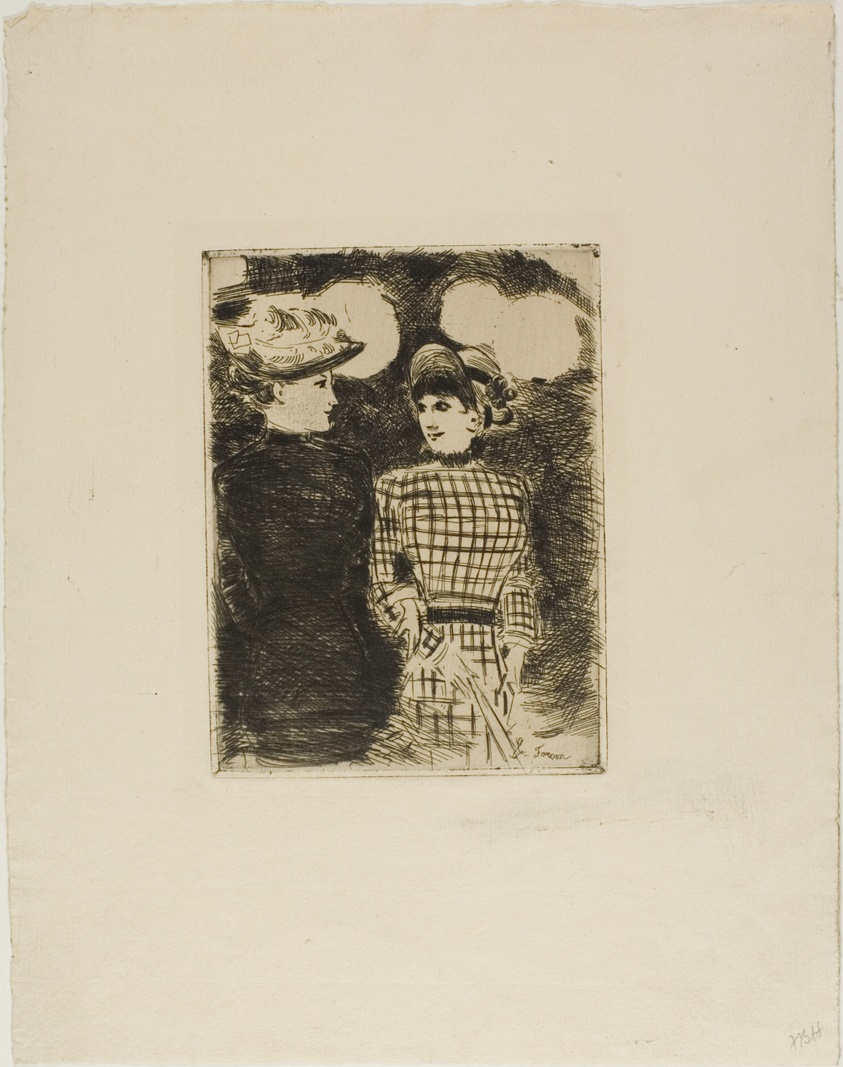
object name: Print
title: To Bullier's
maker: Jean Louis Forain (French, 1852-1931)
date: c. 1876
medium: Etching on cream laid paper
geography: France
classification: etching; print; prints and drawing